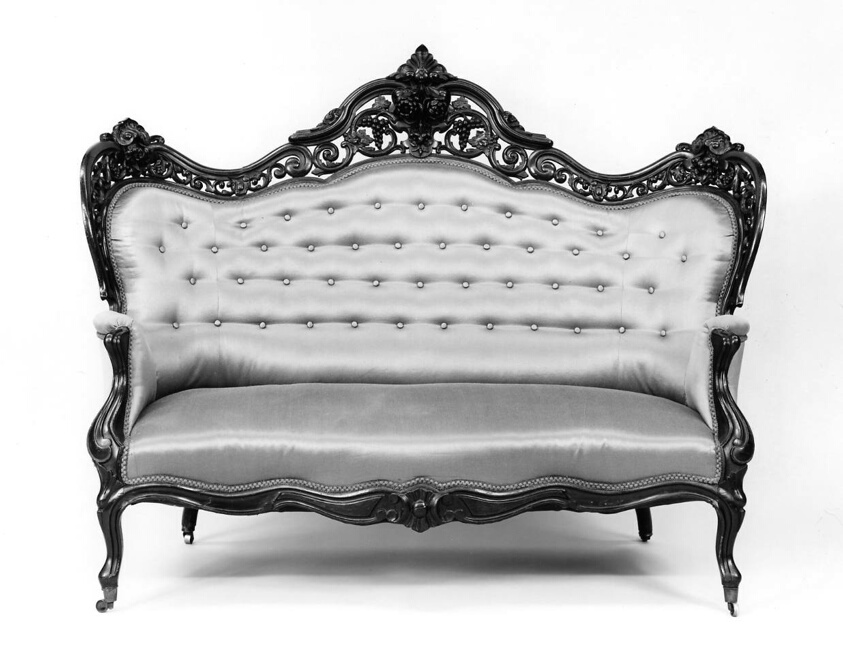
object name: Furniture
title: Sofa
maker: John and Joseph W. Meeks Company; American, active 1836–59; New York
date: 1856–65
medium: Rosewood and upholstery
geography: New York City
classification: seating; furniture; american decorative arts; american arts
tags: furniture